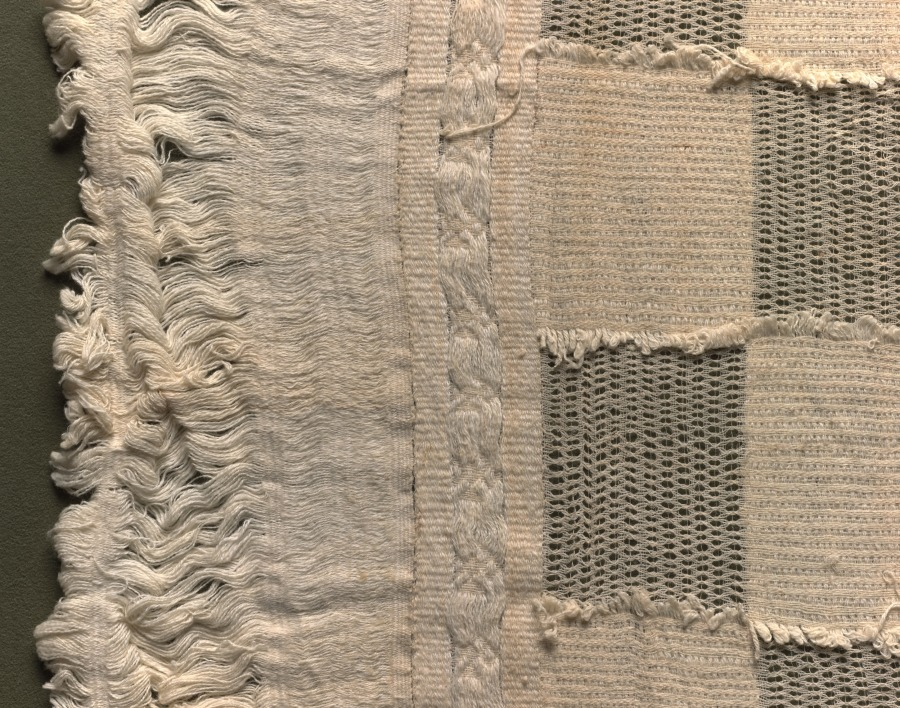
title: Loincloth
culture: Peru, North Coast, Chimú style, 1200–1460s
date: 1425–1500 (radiocarbon date, 92.3% probability)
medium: cotton; plain weave, brocaded and complex alternating gauze with 5 shots of plain weave between gauze shots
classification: Garment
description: Loincloths were basic men’s wear in ancient Peru. But the extraordinary size of some examples—this one is about eight feet long, unfolded—makes it difficult to know how they were worn, except that they were tied around the waist with the decorated panels hanging at the front and back of the body. The appearance may have been that of a billowing skirt.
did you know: This loincloth is huge!